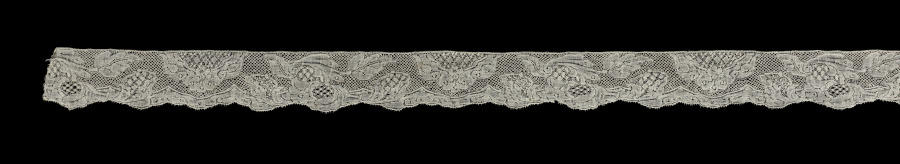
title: Lace Edging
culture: Belgium, Binche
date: 1740–60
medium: Bobbin lace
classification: Lace